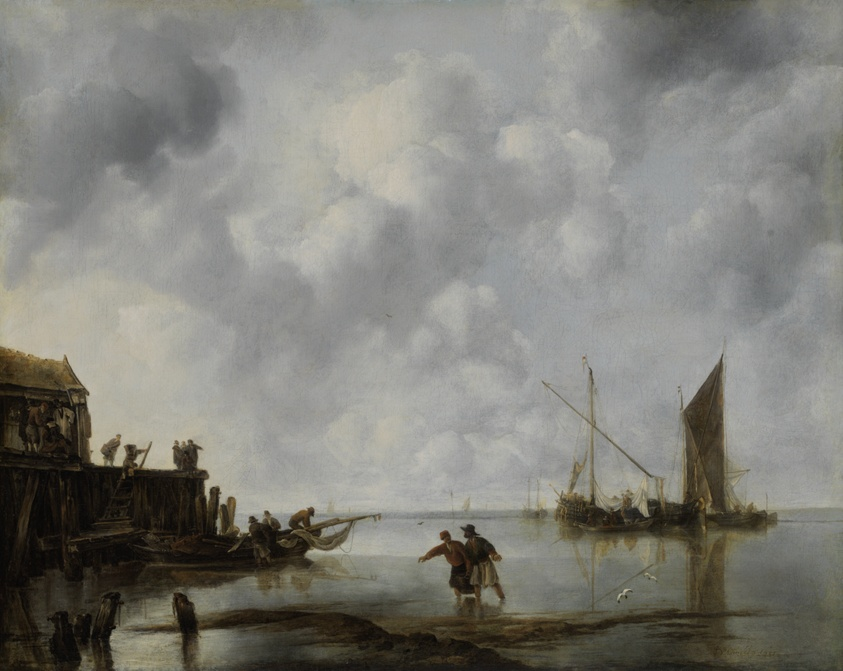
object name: Painting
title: Fishing Boats in a Calm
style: 17th Century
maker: Jan van de Cappelle (Dutch, 1626–1679)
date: 1651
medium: Oil on canvas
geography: Netherlands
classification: oil on canvas; dutch; oil paintings (visual works); paint; painting; european painting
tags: fishing, figures, men, fisherman, bird, sky, fish, boats, boatman, clouds, water